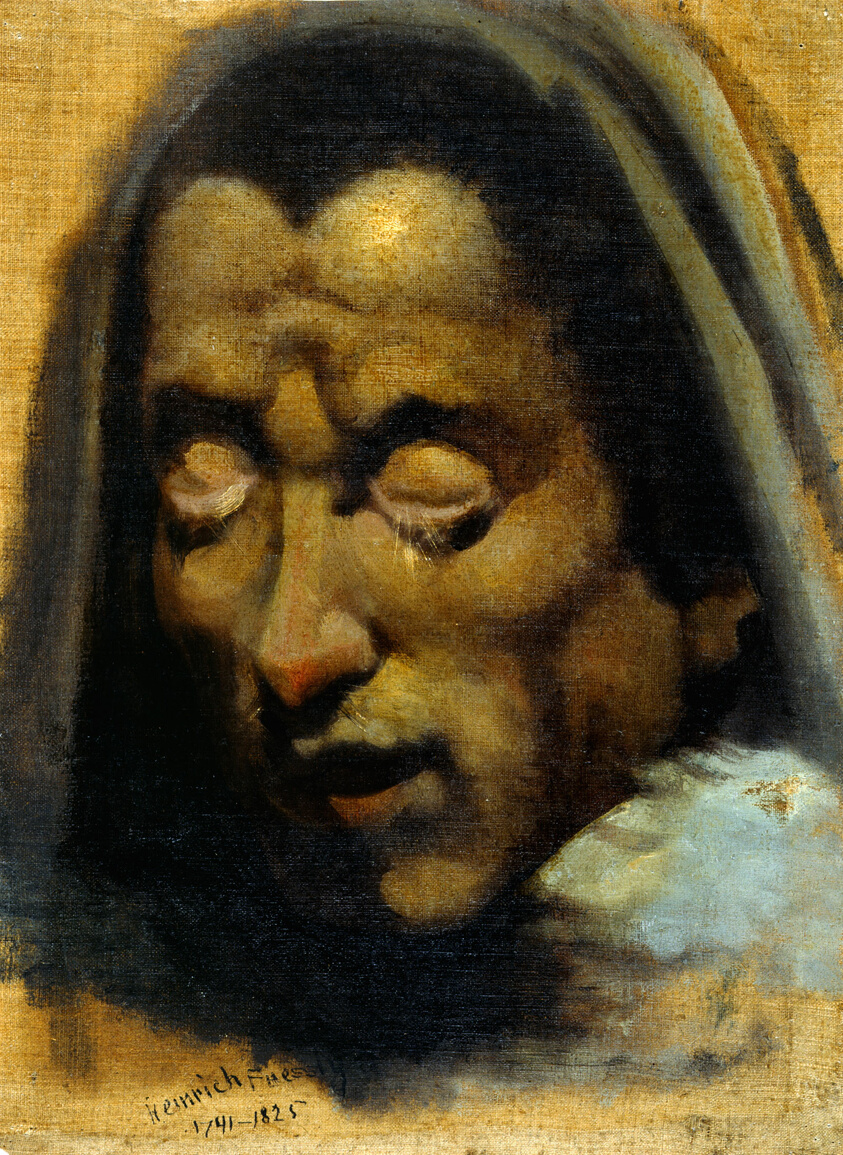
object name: Painting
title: Two Heads of Damned Souls from Dante's "Inferno" (front and back)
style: 18th Century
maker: Henry Fuseli (Swiss, active in England, 1741–1825)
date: 1770/78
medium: Oil on canvas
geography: England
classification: oil on canvas; oil paintings (visual works); paint; painting; european painting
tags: faces, sketch, study, studies, death, figures